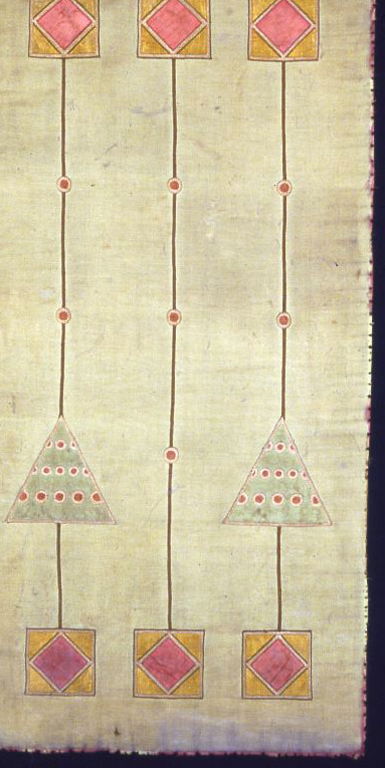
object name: Textile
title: Panel (Dress or Furnishing Fabric)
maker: Worked by Josef Maria Olbrich (German, 1867–1908) or his circle; Austria, Vienna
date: 1901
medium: Silk and cotton, warp-faced weft-ribbed plain weave; watered (moiré); appliquée with silk and cotton, warp-faced weft-ribbed plain weave and warp-float faced satin weave; embroidered with silk and cotton, in chain and overcast stitches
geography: Vienna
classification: textile; needlework (visual works); furnishing textile